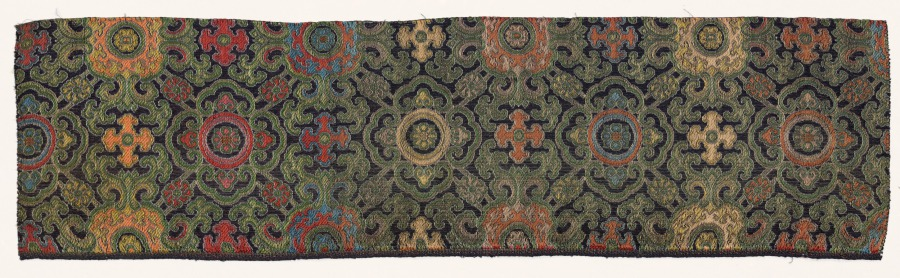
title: Textile Fragment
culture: Japan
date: 1800s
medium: silk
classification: Textile